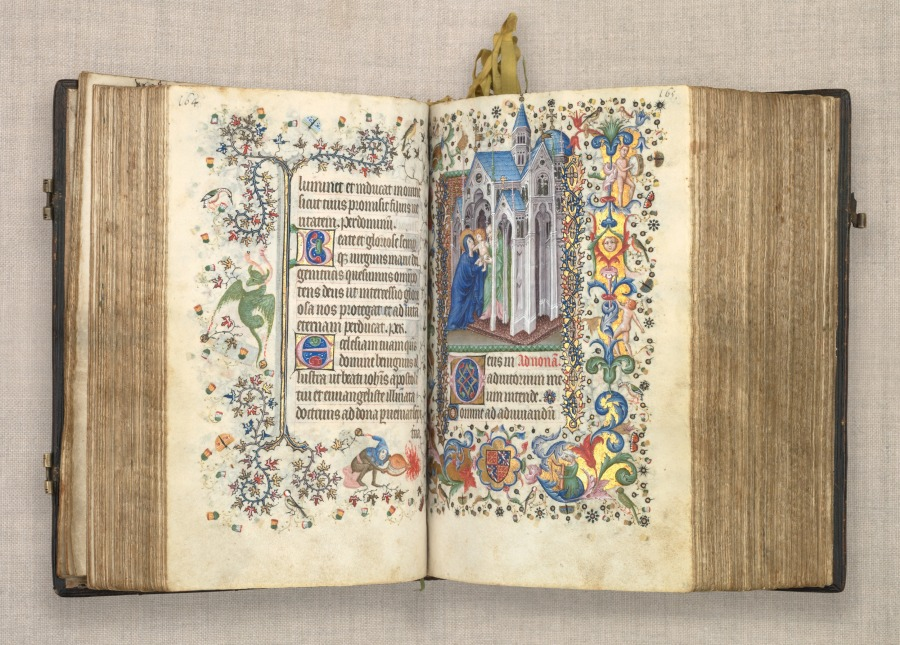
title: Hours of Charles the Noble, King of Navarre (1361-1425): fol. 82v, Text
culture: France, Paris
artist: Master of the Brussels Initials and Associates (French)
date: c. 1405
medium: ink, tempera, and gold on vellum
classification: Bound Volume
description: This precious volume was obviously highly prized by its owner, the French-born King of Navarre, who had his coat of arms painted on no less than twenty folios. Rather than directly commissioning this manuscript from a specific workshop, it seems that Charles the Noble acquired his book of hours -- perhaps ready-made for the luxury market -- while on a trip to Paris in 1404-05. A collaborative effort, six painting styles are evidenced within the pages of this codex, those of two Italians, two Frenchmen, and two Netherlanders. The painter who was responsible for the planning and decoration of the book, and who produced seventeen of the large miniatures, was a Bolognese artist known as the Master of the Brussels Initials. His principal assistant, responsible for most of the borders, was a Florentine who signed his name "Zecho" da Firenze on folio 208 verso.